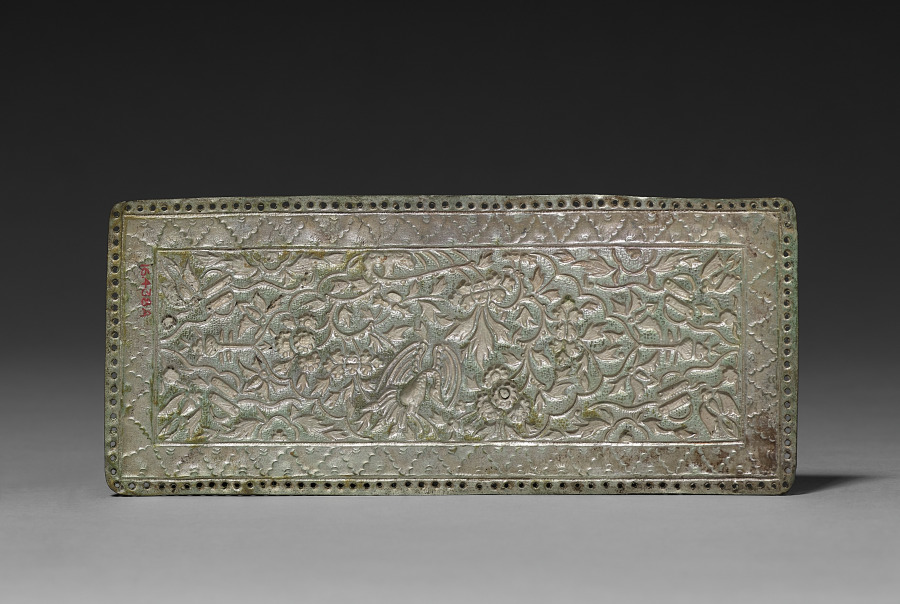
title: Pillow-end Plate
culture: Malaysia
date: 1800s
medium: white metal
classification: Metalwork